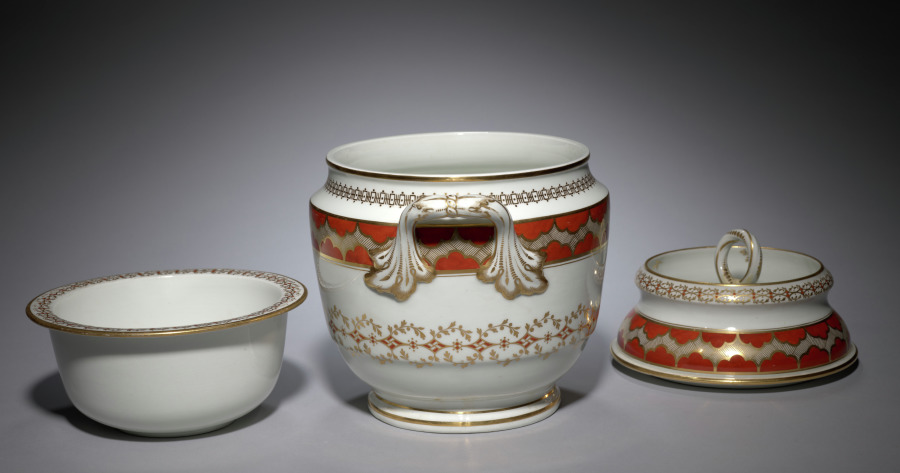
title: Ice Pail (2 of 2)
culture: England, late 18th-early 19th Century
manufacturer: Flight & Barr (British)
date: c. 1792–1804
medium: porcelain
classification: Ceramic